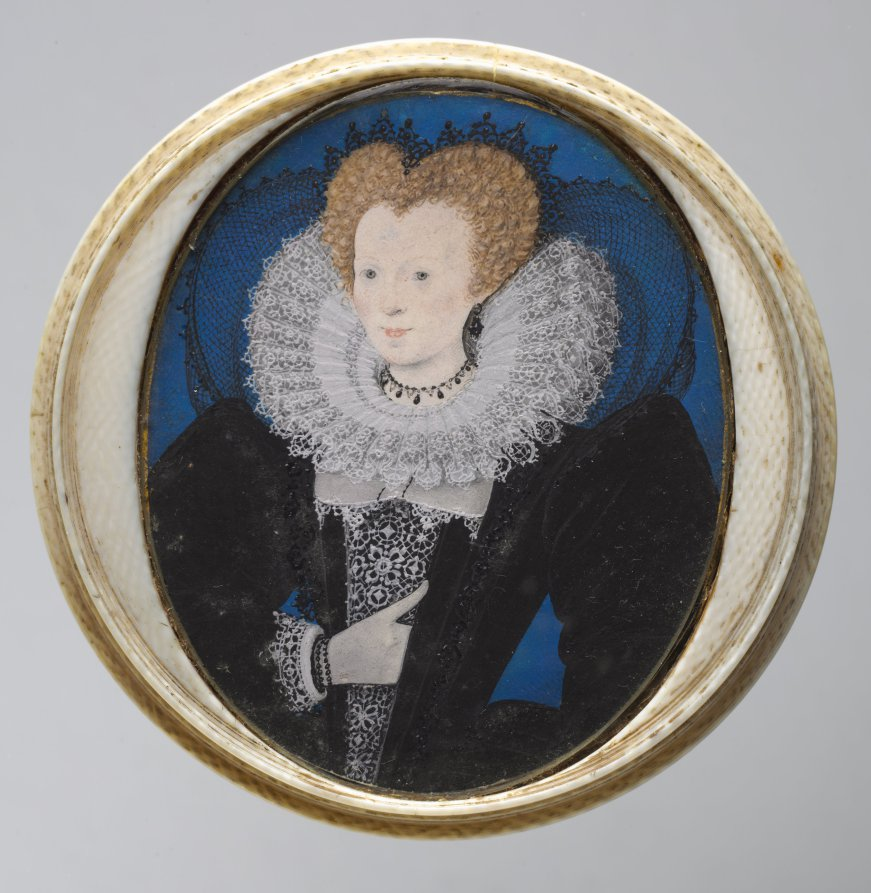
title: Portrait of a Woman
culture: England, 16th century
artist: studio of Nicholas Hilliard (English, c. 1547–1619)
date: 1590s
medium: watercolor on vellum in original turned ivory case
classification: Portrait Miniature